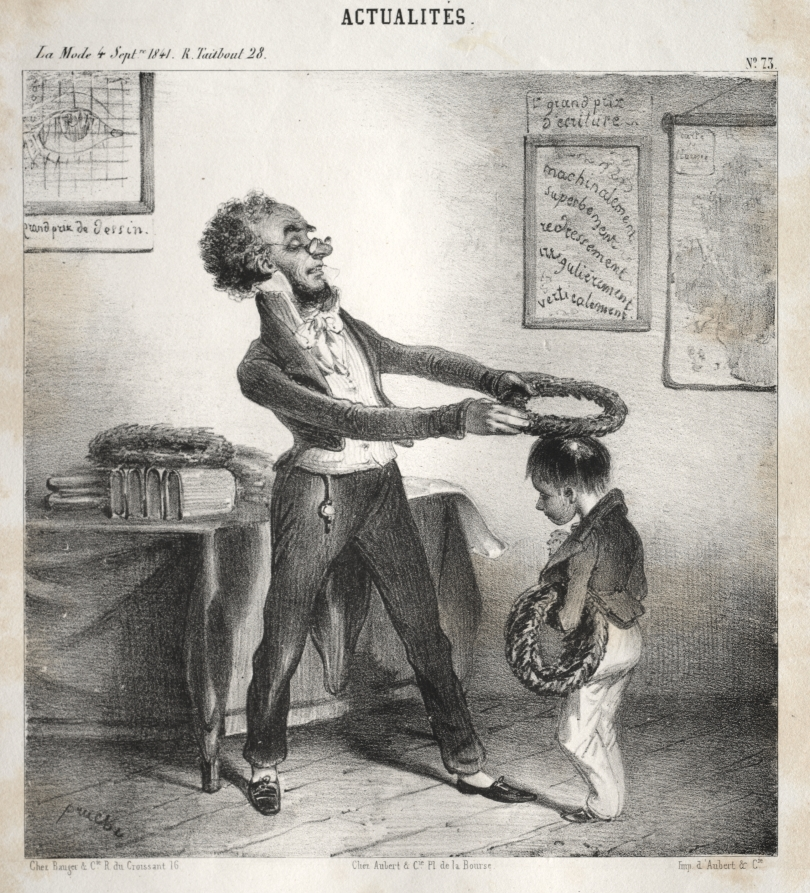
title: Actualités: Les distributions de Prix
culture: France, 19th century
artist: Clémente Pruche (French, 1831–1870)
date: 1841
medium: lithograph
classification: Print